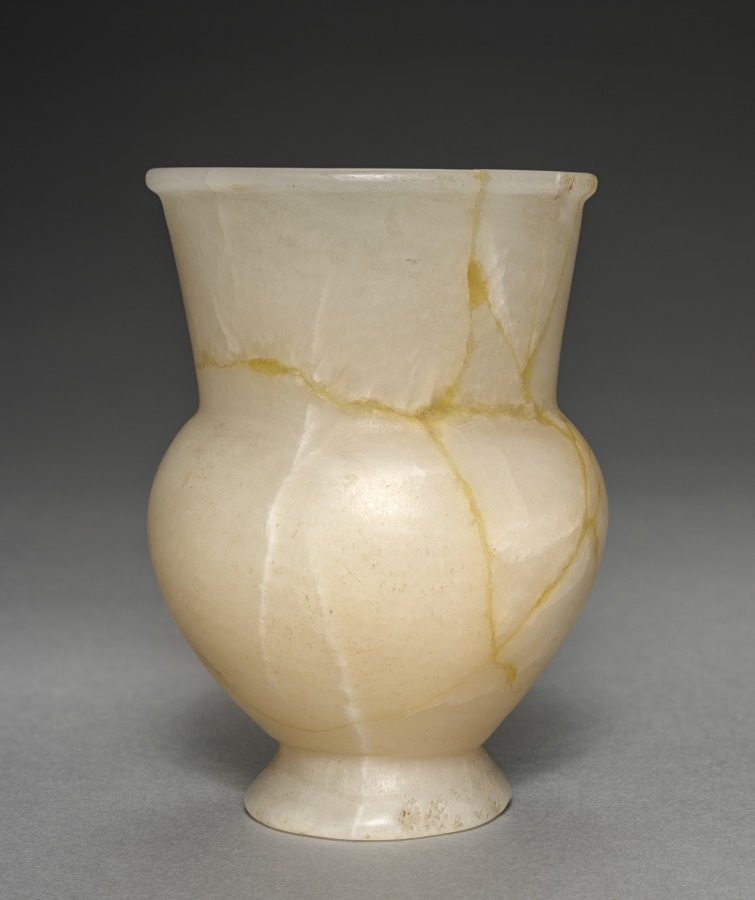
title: Long-Necked Flask (Krateriskos)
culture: Egypt, New Kingdom (1540–1069 BCE), Dynasty 18, reign of Tuthmosis III (1479–1425 BCE)–reign of Amenhotep III (1390–1352 BCE)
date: 1540–1296 BCE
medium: travertine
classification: Vessels